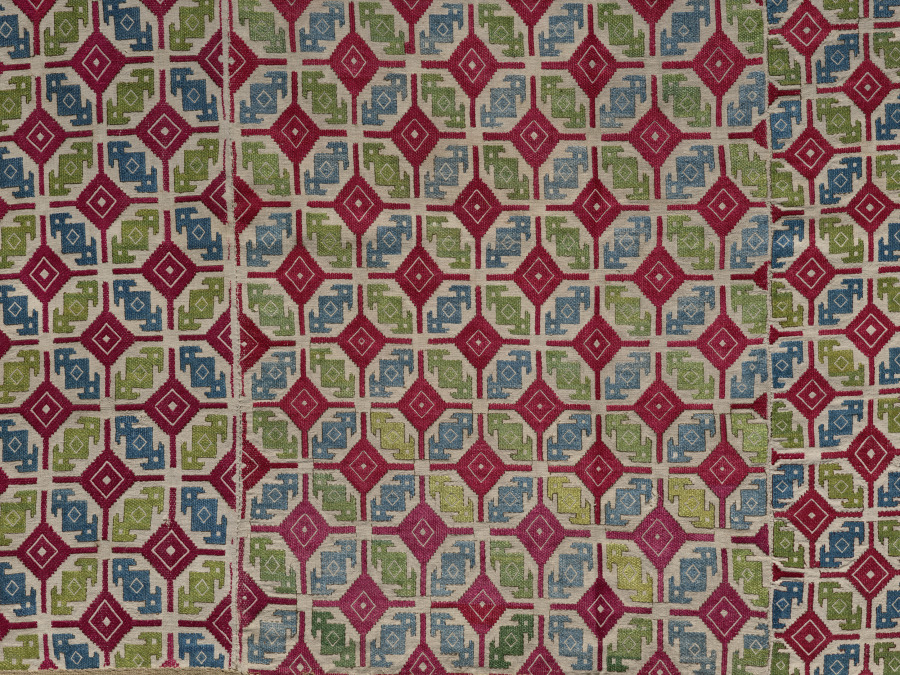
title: Bedspread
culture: Greece, Cyclades Islands, Naxos, 19th century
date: 1800s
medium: embroidery: silk on linen tabby ground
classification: Embroidery